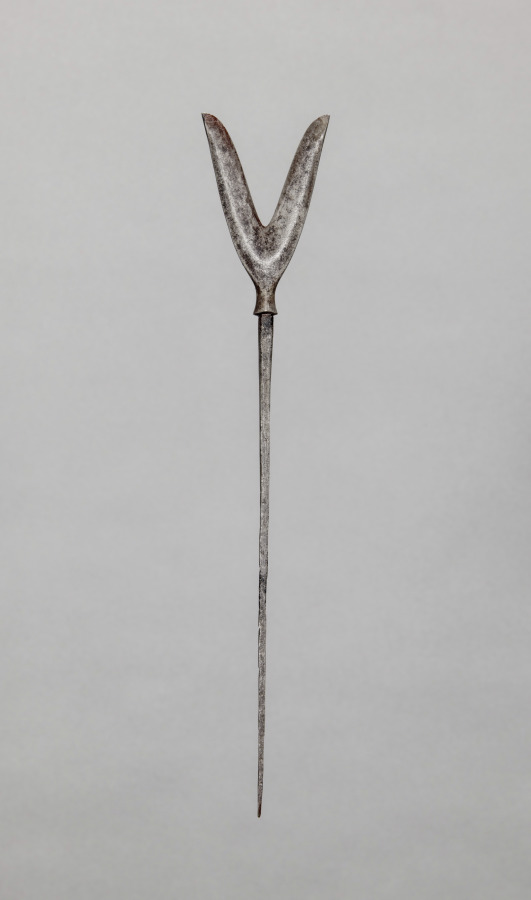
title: Arrow Point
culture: Japan, Edo period (1615–1868)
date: 1700s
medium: steel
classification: Arms and Armor